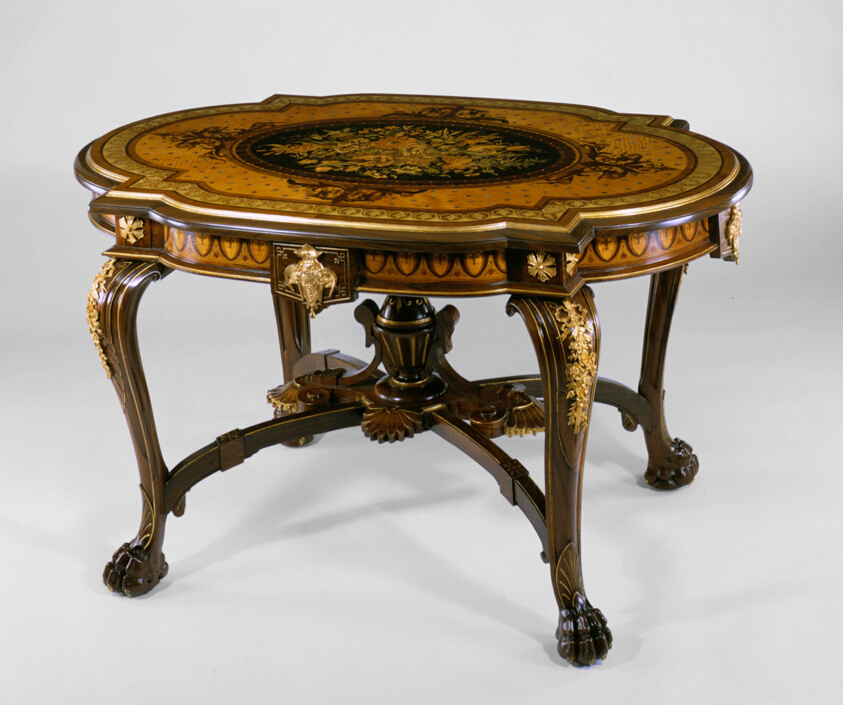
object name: Furniture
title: Center Table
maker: Marquetry top by Joseph Cremer (French, active 1836–1878); Paris, France; Table by unknown artist (American, 19th century); New York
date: c. 1862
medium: Rosewood, maple, tulip poplar, and white pine, with mother-of-pearl and ormolu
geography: Paris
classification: table; furniture; american decorative arts; american arts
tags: furniture